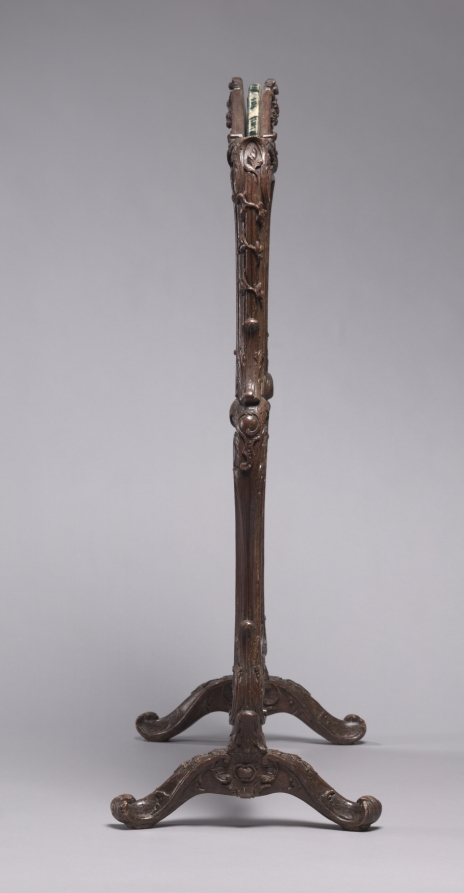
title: Fire Screen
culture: France, 18th century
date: c. 1750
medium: wood and velvet panel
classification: Furniture and woodwork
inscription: inscribed beneath in three places: 32.